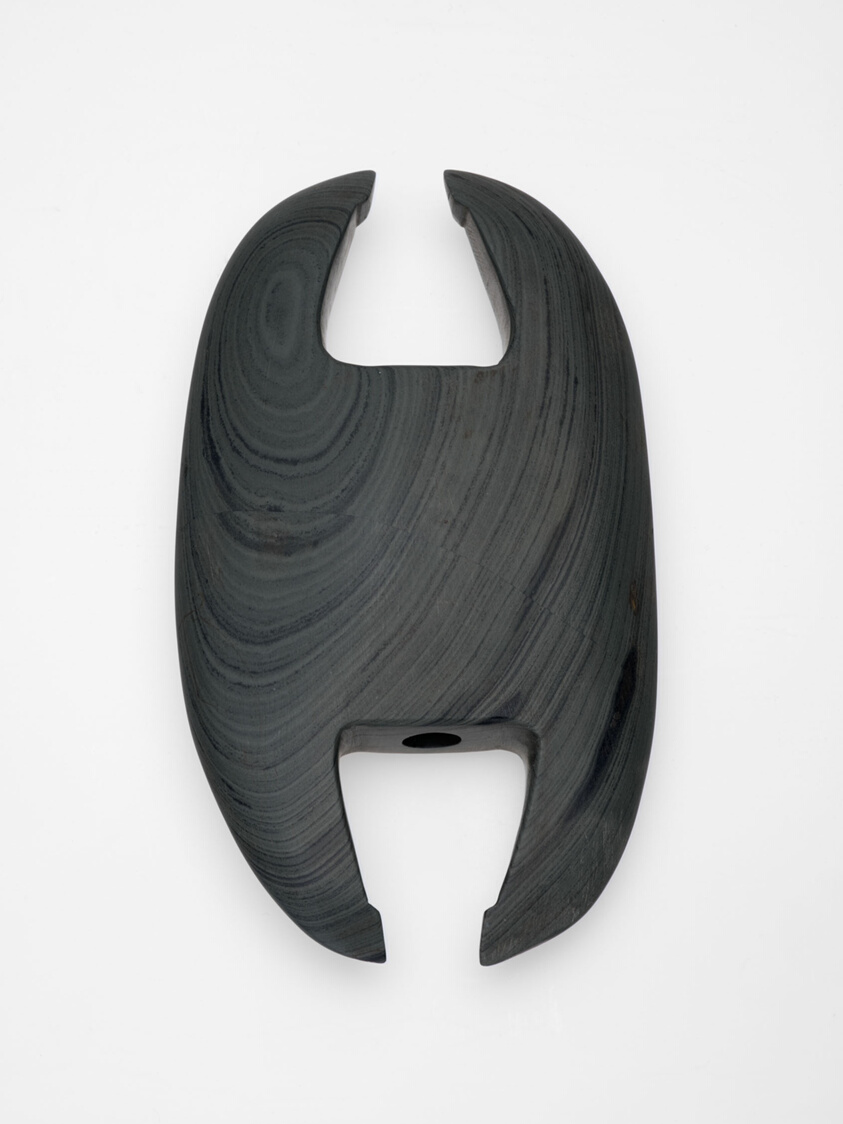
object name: Sculpture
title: Notched Ovate Bannerstone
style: native american, archaic america, midwestern, Arts of the Americas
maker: Archaic (Bokes Creek, Union County, Ohio, United States)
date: c. 4800 BCE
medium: Banded slate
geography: Ohio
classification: stone; art of the americas; sculpture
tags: authority